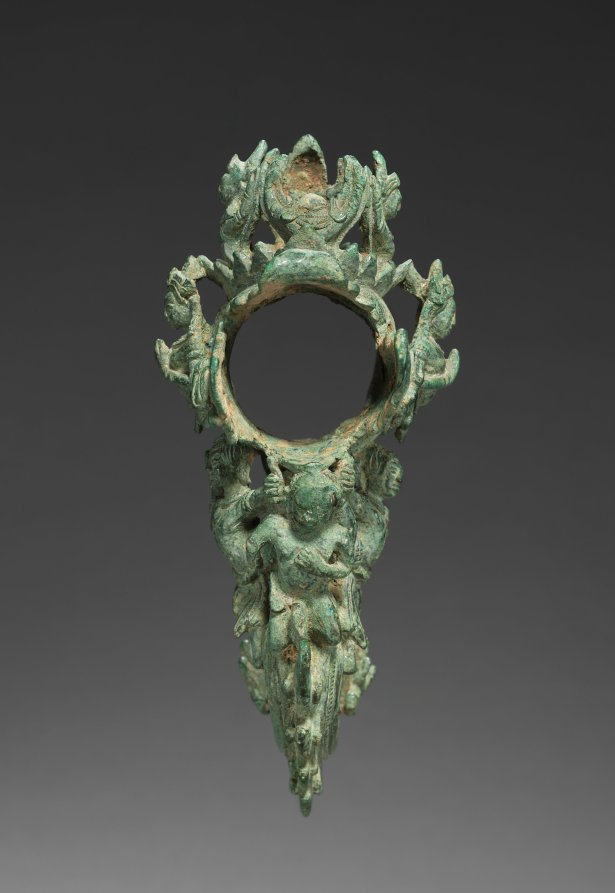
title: Palanquin Hook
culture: Cambodia, probably Angkor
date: 1175–1230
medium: bronze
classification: Sculpture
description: When members of the royal family or priesthood traveled in a public festival procession or to a temple to make offerings or participate in a ceremony, they would be carried in a palanquin, or a covered litter. Portable objects of veneration, such as bronze images or a sacred fire, were also carried on palanquins. The palanquins had wooden poles, hanging seats or raised platforms, and bronze fittings cast in intricate forms and gilt, lending the palanquins a sumptuous quality. This hook once supported a bronze ring from which hung a seat, like a hammock or swing. A wooden pole would have passed through the hollow socket at the top and was carried on the shoulders of bearers. The hook segment ends in the face of a garuda, a man-eagle with a prominent beak, stylized wings, and feathers. Figures indicative of devotion and success, including pairs of elephants, crown the fitting.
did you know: In the middle of the hook, a figure holding a sword in one hand and his extended leg in the other is in a dance pose expressing vigorous attack.